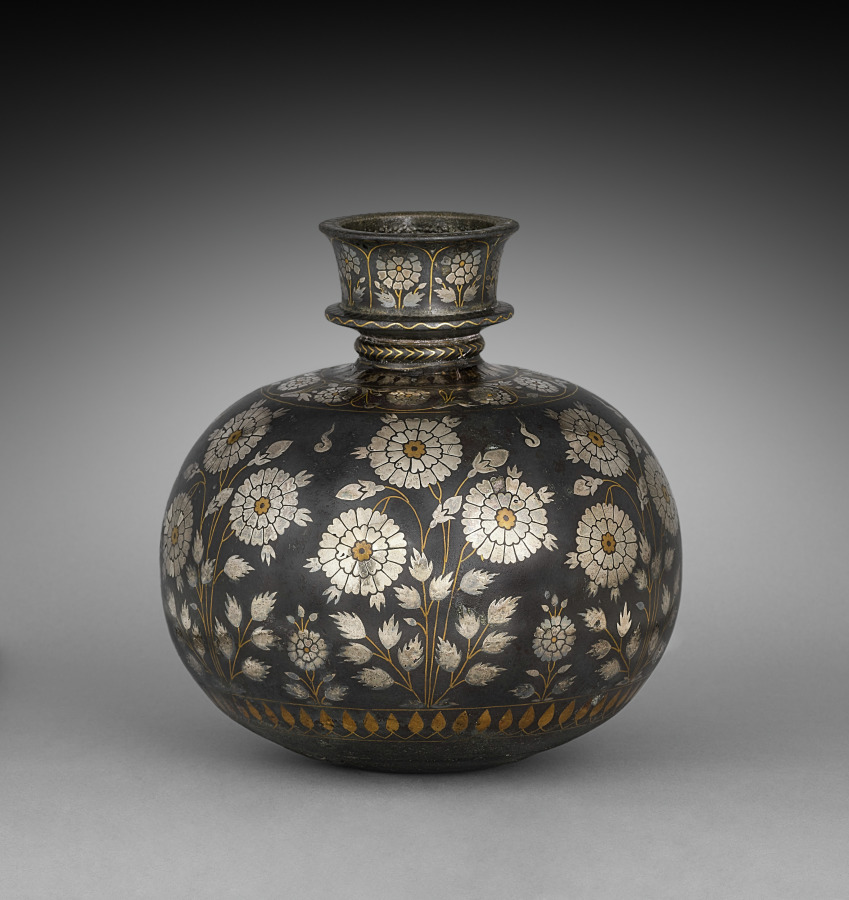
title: Bidri Hookah Bowl with Roses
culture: Southwestern India, Deccan, Karnataka, Bidar​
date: c. 1650s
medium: Zinc alloy with silver and brass inlay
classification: Metalwork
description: Hookah bowls were used for the enjoyment of tobacco or any other smoked substance during moments of relaxation. They were also aesthetic objects to be admired in elite gatherings of connoisseurs. The flowering rose bushes on this fine early example, made shortly after the introduction of tobacco-smoking in India, would have called to mind celebrated poetical works, such as the Gulistan (Rose Garden) of Sa'di (Persian, 1210–1291 or 1292).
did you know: Bidri ware is cast from condensed vapors of zinc mined from Sawar in Rajasthan.